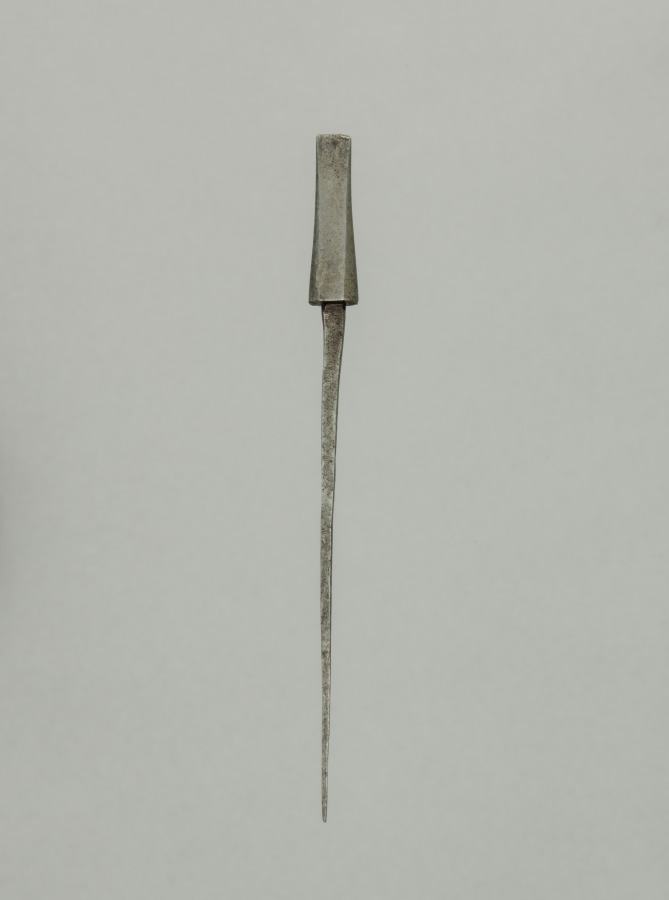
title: Arrow Point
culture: Japan, Edo period (1615–1868)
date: 1700s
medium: steel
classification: Arms and Armor